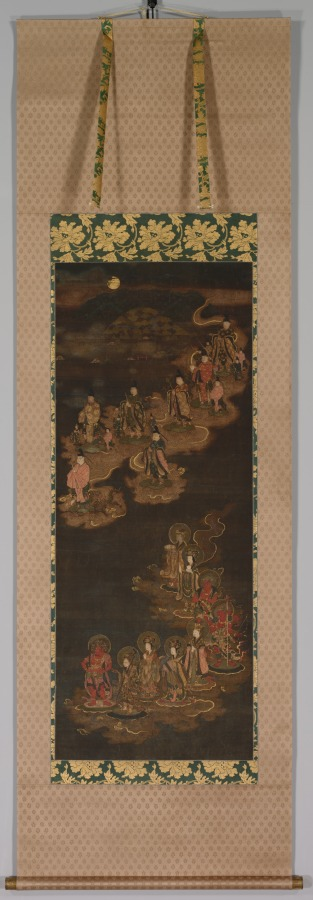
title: Descent of the Nine Luminaries and the Seven Stars at Kasuga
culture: Japan, Nanbokuchō period (1336–92)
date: mid- to late 1300s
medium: Hanging scroll; ink, color, gold and cut gold on silk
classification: Painting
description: This medieval religious painting shows celestial beings descending from the heavens into the Kasuga Shrine, a major religious site in Japan's ancient capital, Nara. The moon and the Kasuga mountain range appear in the uppermost portion of the painting, as does a red shrine entrance gate, or torii. In the upper part of the painting, figural representations of the stars in the constellation known as the Big Dipper in the West descend from right to left on cloud banks. In the lower part, the Nine Luminaries (Sanskrit: Navagraha) that emerged from the Vedic tradition—the sun and moon; the planets Jupiter, Mars, Saturn, Venus, and Mercury; and personifications of the fluctuating lunar nodes—descend in similar fashion. The painting uses the "deities in descent" scheme originating in China, as well as the original Buddhist form mandala (Japanese: honjibutsu mandarazu) format prevalent in medieval Japanese Shinto-Buddhist painting, to generate an image connected to the worship of celestial bodies in Esoteric Buddhism.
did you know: A 19th-century copy of this painting in ink and light color exists at the Kyoto City University of Arts.